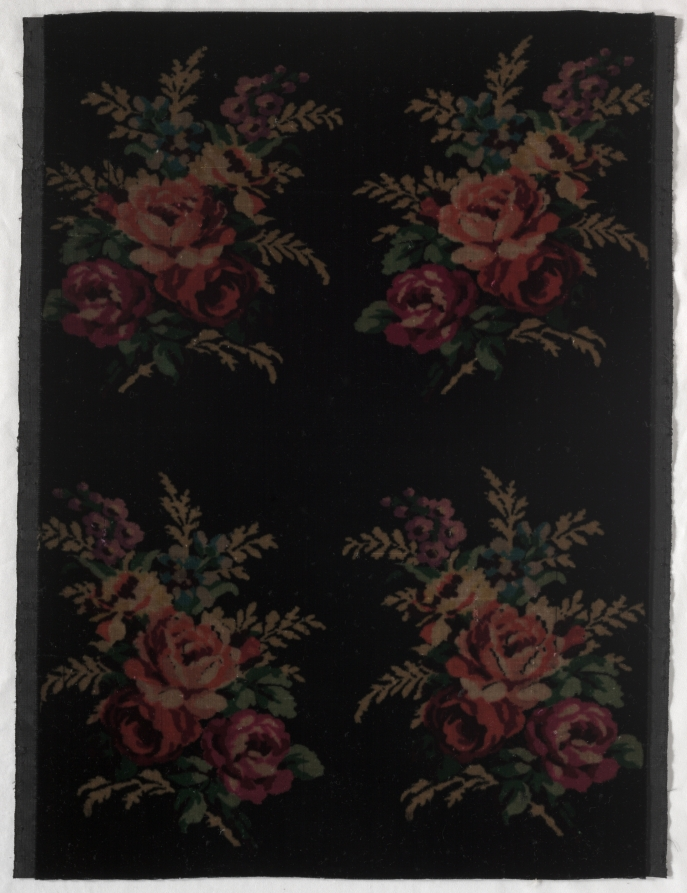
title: Cut Silk Velvet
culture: France, 19th century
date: 1800s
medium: velvet; silk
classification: Velvet